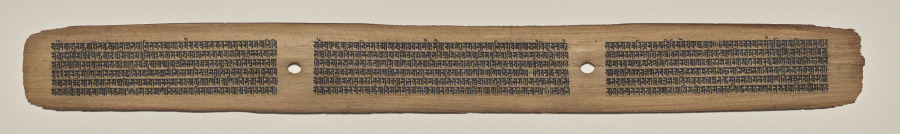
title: Text, Folio 7 (recto), from a Manuscript of the Perfection of Wisdom in Eight Thousand Lines (Ashtasahasrika Prajnaparamita-sutra)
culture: Eastern India, Bihar, Vikramashila Monastery. Painting: Nepal, Kathmandu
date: Sunday, September 14, 1119 (year 239 of the Newar Samvat in the month of Ashvina)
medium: palm-leaf pages, wooden covers; ink and color on palm leaves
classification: Painting